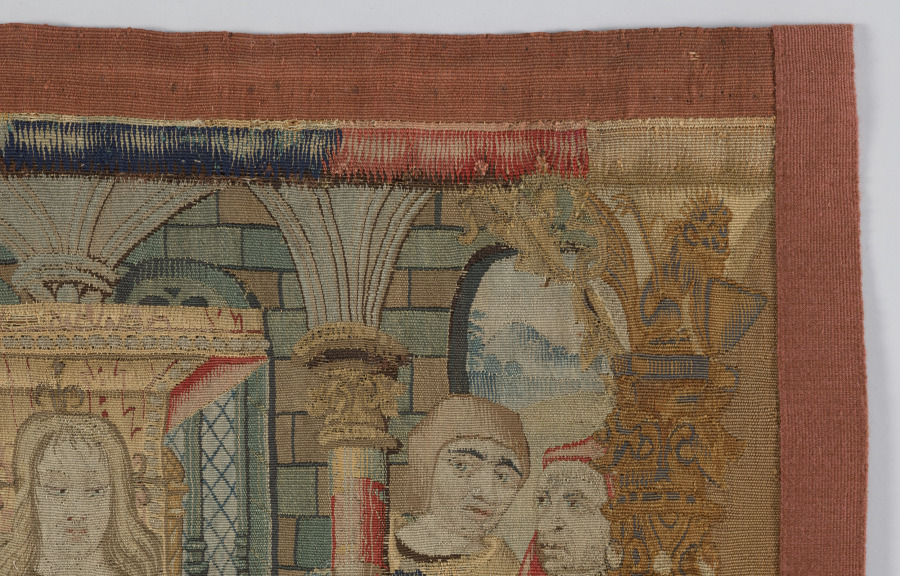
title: Altar Frontal: Scenes from the Childhood of Christ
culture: France and South Netherlands, 1500s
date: c. 1500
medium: Wool, silk, gold thread; tapestry weave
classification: Tapestry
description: Pictorial tapestries were symbols of wealth and more highly prized than paintings. Small tapestries with Christian imagery were frequently commissioned to embellish the fronts of altars. This example displays the Massacre of the Innocents, the Flight into Egypt, and Christ among the Doctors. Tapestry weave is ideal for creating narrative scenes. The technique can be compared to painting, as each colored weft (horizontal thread) is interlaced with warps (vertical thread) where needed for the pattern. As expensive investments, tapestries have the advantage of being portable and easily stored and displayed.